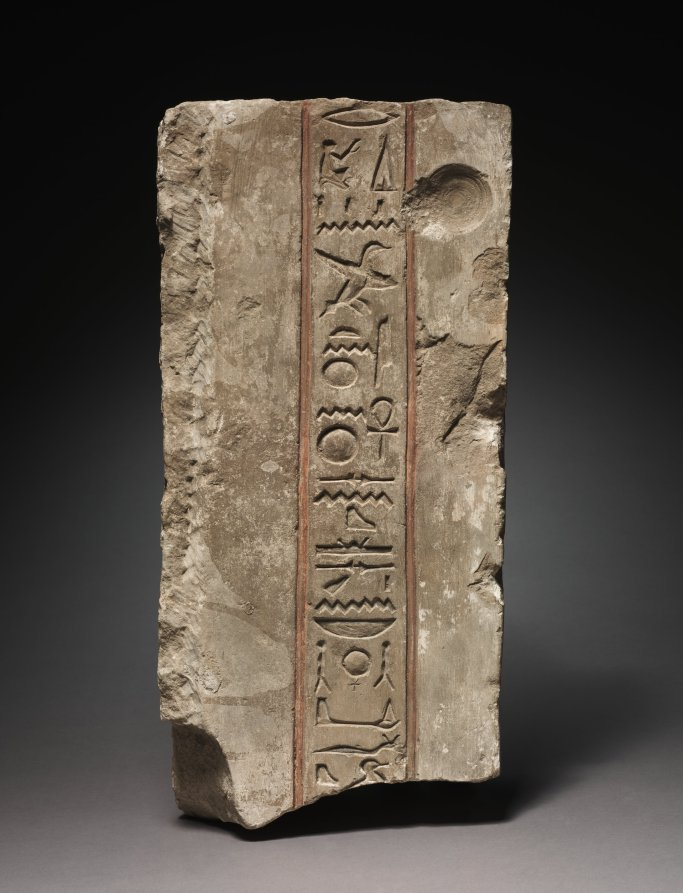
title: Inscribed Doorjamb with Praise to the Aten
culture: Egypt, New Kingdom (1540–1069 BCE), Dynasty 18, reign of Akhenaten (1351–1334 BCE)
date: 1353–1337 BCE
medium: limestone, originally painted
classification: Sculpture